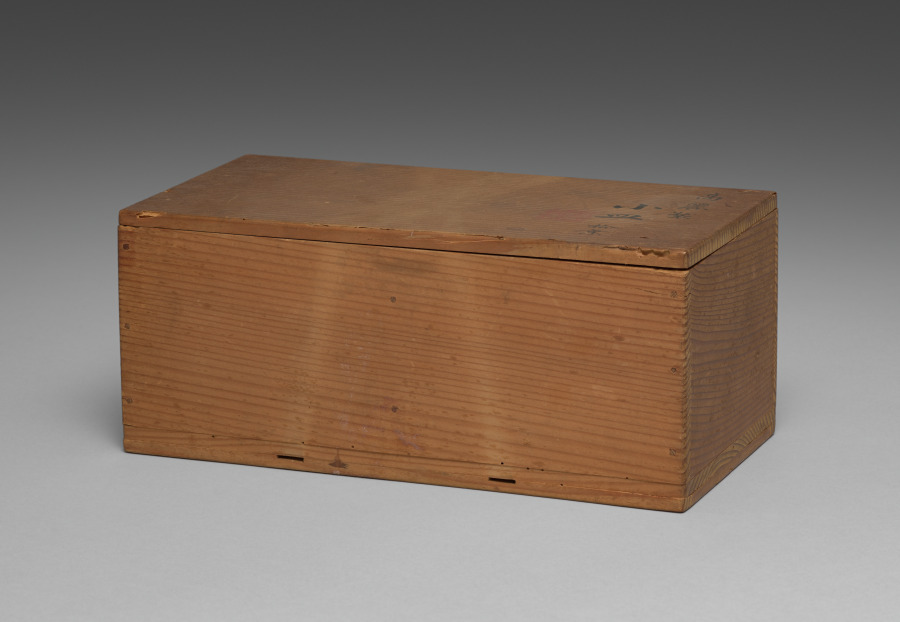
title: Dining Set with Plum Blossoms and Cracked-Ice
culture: Japan, Edo period (1615–1868) to Meiji period (1868–1912)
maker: Seifū Yohei II (Japanese, 1844–1878)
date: 1875–78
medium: Porcelain with molded designs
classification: Ceramic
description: Each item in this set has a delicate low-relief design of flowering plum branches over scattered, intersecting lines meant to resemble the cracked-ice surface of a frozen body of water and is signed on the base in gold pigment. While Yohei II produced many fine works in underglaze blue, like those produced by Kiyomizu Shichibei, he also made works in quite different styles later in his career, from the early 1870 s. In 1873, he was appointed purveyor to the Industrial Center of Kyoto Prefecture, a designation associated with Kyoto’s efforts to reach an international market through the port of Kobe; and from 1875 until his death, he was involved in national-level projects to present Japanese ceramics across the world. It was during this period that Yohei III was apprenticed to Yohei II, and it has been suggested that this set may in fact be an early example of Yohei III’s work, which he signed with his teacher’s name. Decorated with flowers resembling Japanese textile motifs, the set calls to mind the design of Yohei II’s pair of vases with plum blossoms in the Victoria and Albert Museum. Here, the elaborate trees created for a formal public exhibition setting have been translated into the approachable blossoms of the genteel domestic environment. While the designs are consistent across the pieces, each raised flower petal and pistil and each incised line in the ice was done by hand, so the cups, bowls, and dishes are similar yet unique. The bottoms of two boxes once identified the set’s owner, but the information has been deliberately obscured with black ink. However, inscriptions still visible appear to indicate two occasions, once at the end of July 1886 , and once again in June 1916 , when parts of the set were requested from Hokura in Niigata Prefecture. The location corresponds to a neighborhood in the present-day city of Jōetsu. The surname Tsuji 辻 also appears on a paper tag affixed to one of the box cloths. Future research may possibly reveal more about their provenance. A vase by Yohei III in a private collection combines the formal grandeur of the Yohei II vases in the Victoria and Albert Museum with the gentler design of this dining set, placing flowering plum trees against soft, scalloped-edge clouds resembling those in golden screens.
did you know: The dining wares have a creamy white coloration that the four boxes containing them identify as Korean in style.